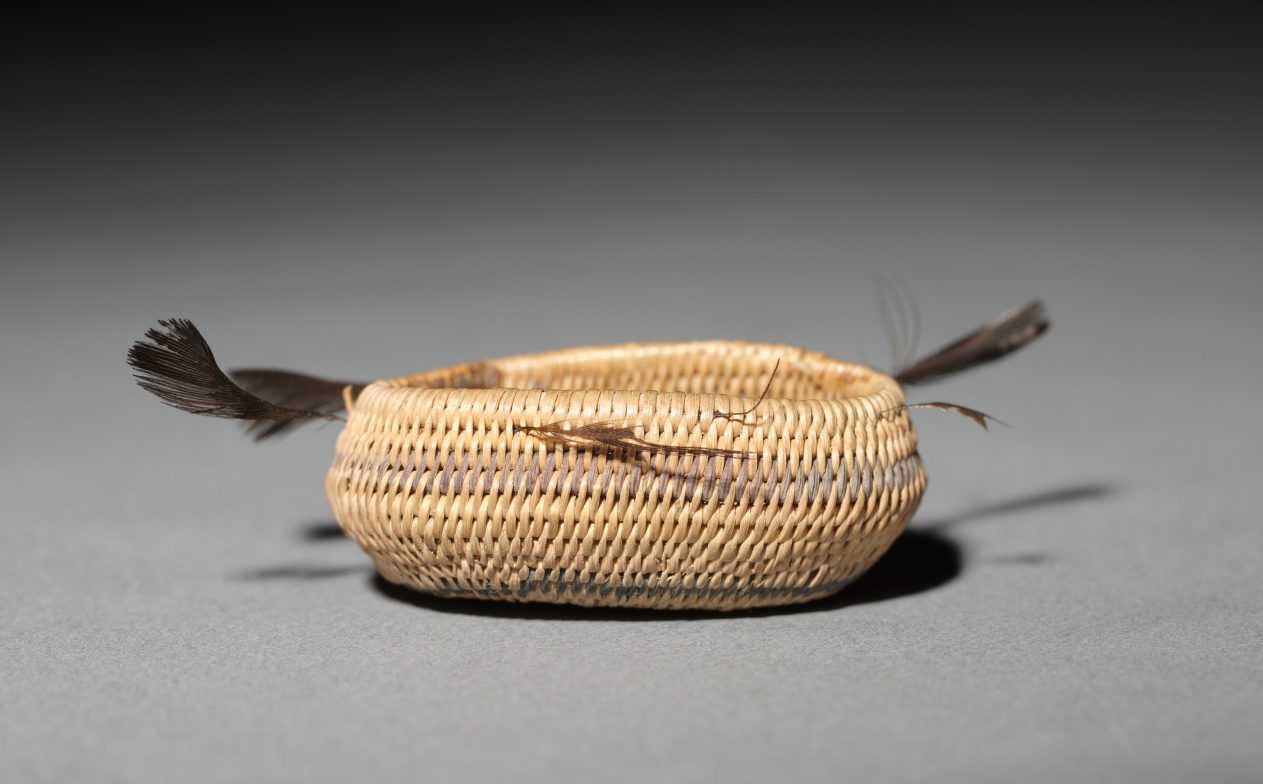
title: Miniature Rhomboidal Basket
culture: California, Pomo, 20th century (?)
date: Early 1900s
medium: coiled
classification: Basketry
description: Miniature baskets were made to demonstrate the basket-maker’s virtuoso skill, and these tiny marvels seem to be no exception—the smallest are just a few millimeters wide but still patterned. For such fine work, dexterity was required as much for preparation of materials as for weaving.